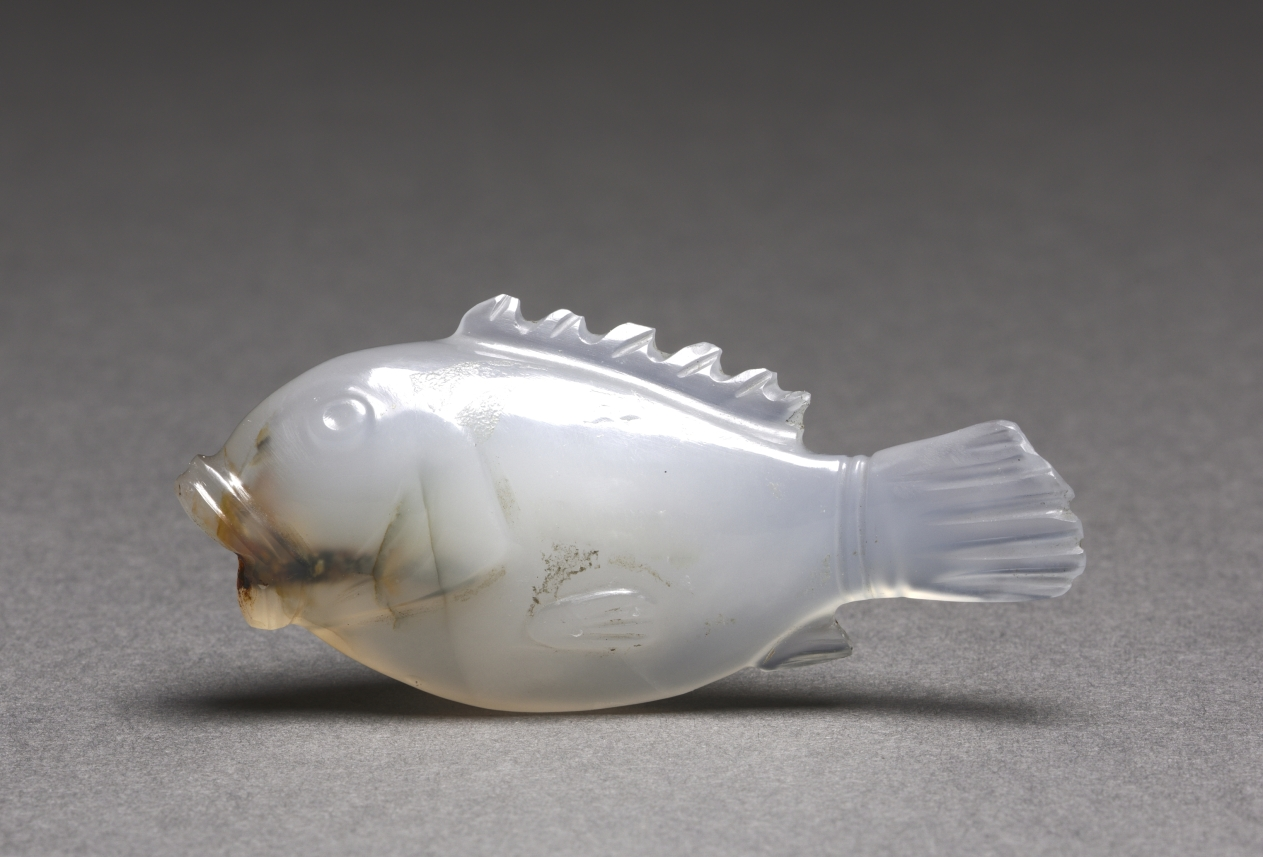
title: Fish Gem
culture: Syria(?) or Anatolia, early Christian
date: c. 250–350 CE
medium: rock crystal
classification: Glyptic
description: To avoid punishment, early Christians practiced their faith in secret. Images of fish were part of a code developed to refer to Jesus Christ. To those in the know, the Greek word for fish (ICHTHYS), was an acronym for the phrase Iesous Christos Theou Yios Soter which translates as Jesus Christ, Son of God, Savior.